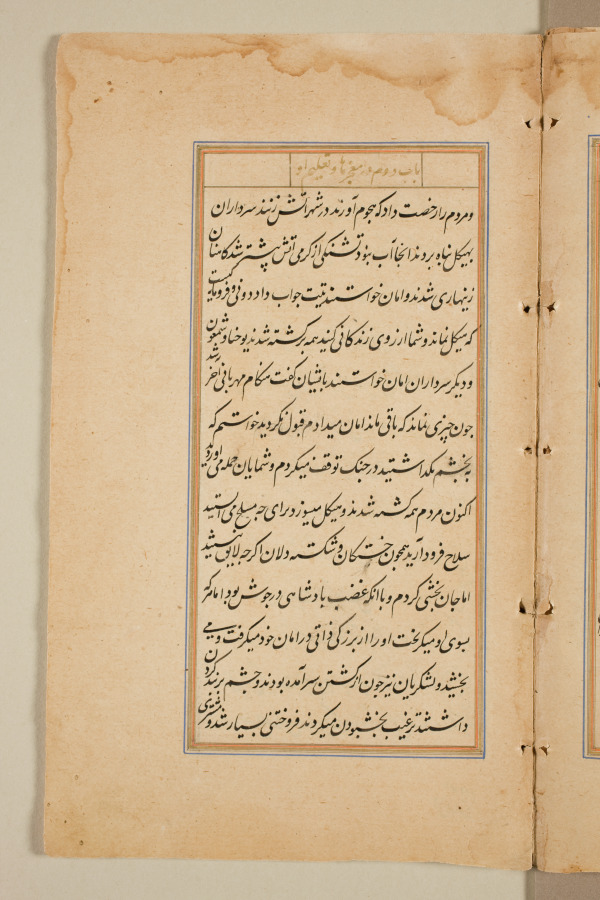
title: Text page from a Mirror of Holiness (Mir’at al-quds) of Father Jerome Xavier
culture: Mughal India, Allahabad, made for Prince Salim (1569–1627)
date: 1602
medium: Ink and gold on paper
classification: Manuscript